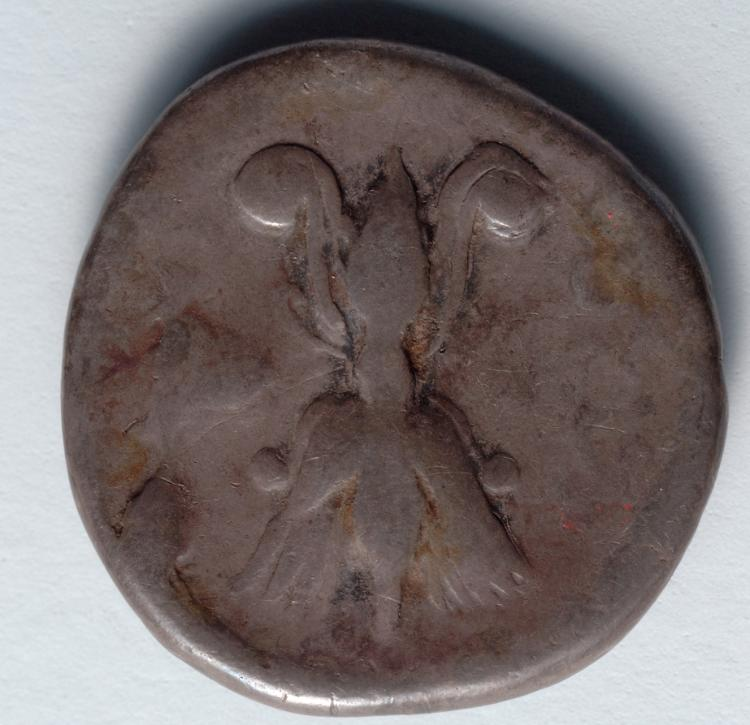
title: Stater: Thunderbolt with Wings and Volutes (reverse)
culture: Greek, probably minted at Elis (Elis)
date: c. 400 BCE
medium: silver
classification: Coins